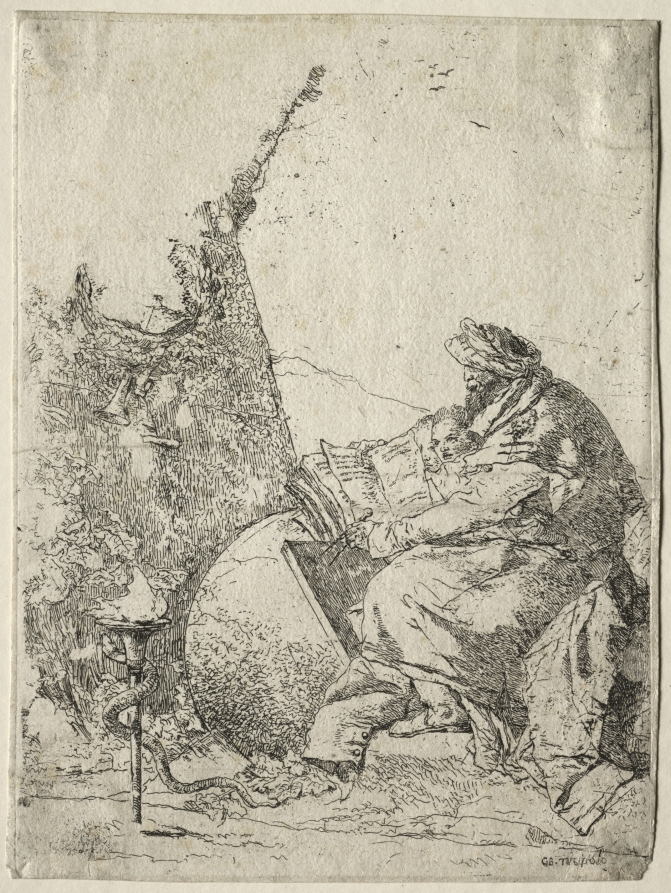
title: Scherzi di Fantasia: The Philosopher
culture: Italy, 18th century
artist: Giovanni Battista Tiepolo (Italian, 1696–1770)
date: 1750–60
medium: etching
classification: Print